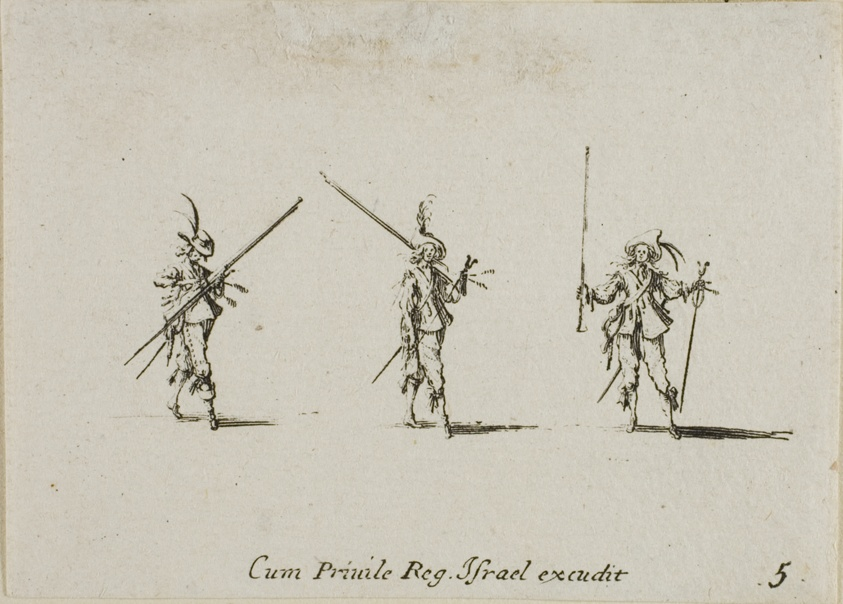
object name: Print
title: Drill with Tilted Pikes, plate five from The Military Exercises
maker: Jacques Callot (French, 1592-1635); published by Israël Henriet (French, 1590-1661)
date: published 1635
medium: Etching on paper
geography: France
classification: etching; print; prints and drawing